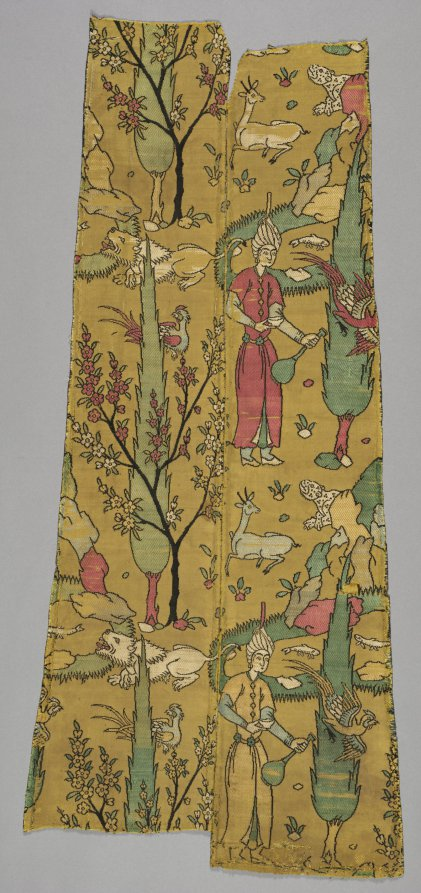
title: Wine bearers in landscape, from a robe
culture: Iran, Safavid period (1501–1722)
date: 1525–50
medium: Silk: lampas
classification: Textile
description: Iran is renowned for representations of large human figures in luxury silks during the Safavid period. Symbolic images of beauty and love characterize this signature silk in which a wine bearer appears in a landscape with cypresses and blossoming prunus trees, a pond, and a rocky hill along with animals of royal hunts. Cypresses and long-neck bottles were metaphors for elegance and male beauty while cypresses entwined by blossoming trees, paired pheasants, youth, and wine impart themes of love. The asymmetrical composition contrasts vitality and order, which contributes to concealing the repeated design inherent in patterned silks.